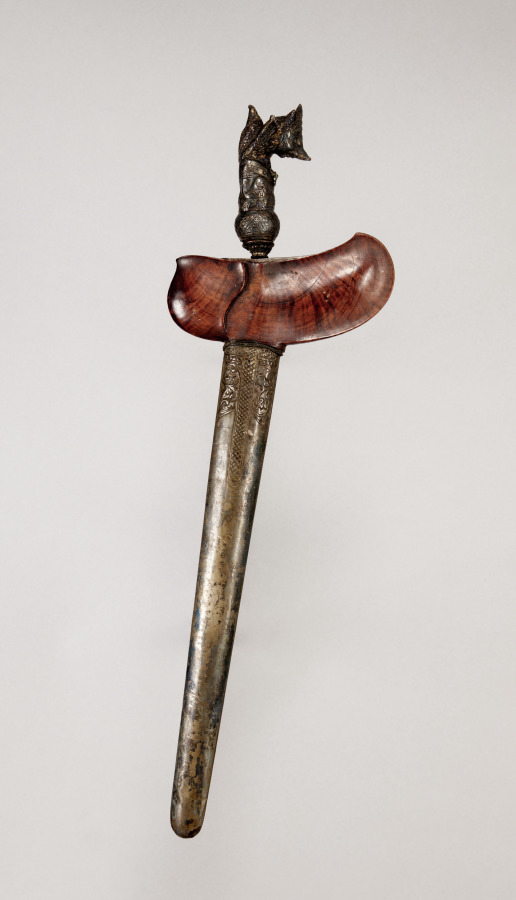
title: Sword (Kris)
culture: Java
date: 1800s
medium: iron and silver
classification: Arms and Armor